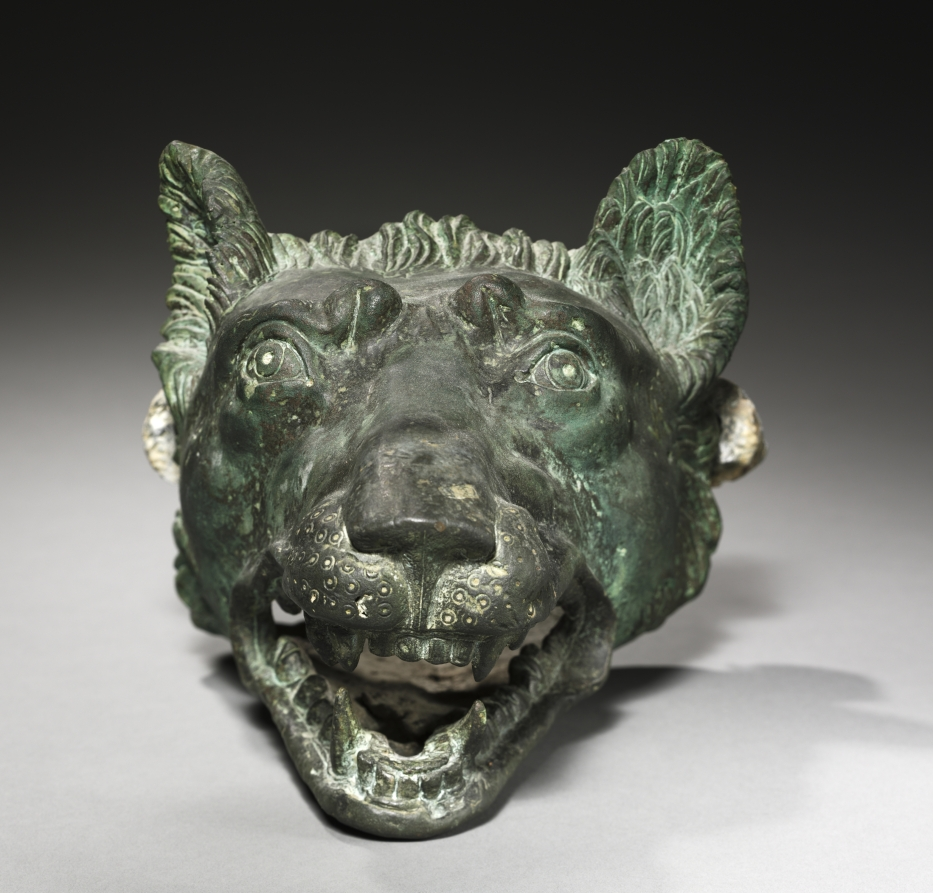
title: Wolf-Head Barge Fixture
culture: Italy, Rome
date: 1–100 CE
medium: bronze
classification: Sculpture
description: This snarling wolf head is closely similar to others that were attached to a luxurious pleasure barge moored on Lake Nemi, near Rome. The ship was designed as a floating platform for elaborate parties, and included impressive bronze fittings to ornament the wooden structure. Beam ends were capped with lion, panther, and wolf heads, each with a large bronze ring between its teeth.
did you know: The wolf is an important symbol of Rome, having reared its mythical founders, Romulus and Remus.